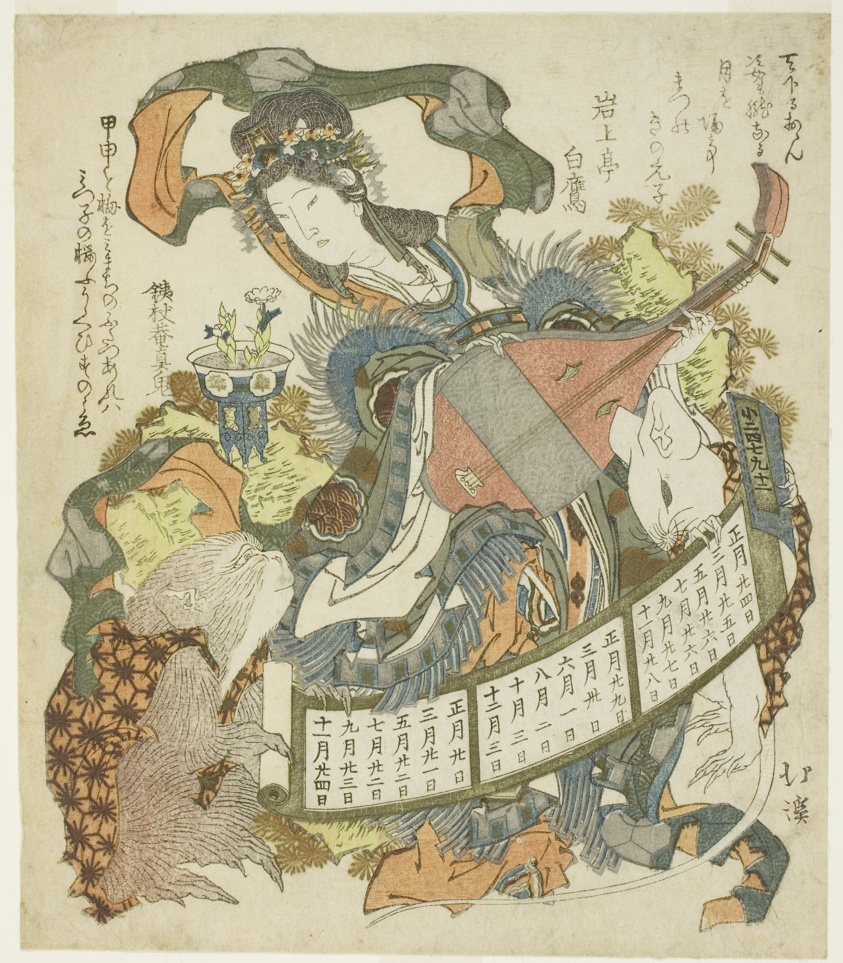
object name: Print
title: Benzaiten with monkey and rat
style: Japanese (culture or style)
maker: Totoya Hokkei (Japanese, 1780-1850)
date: 1828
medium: Color woodblock print; shikishiban, surimono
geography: Japan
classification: woodblock print; print; asian art